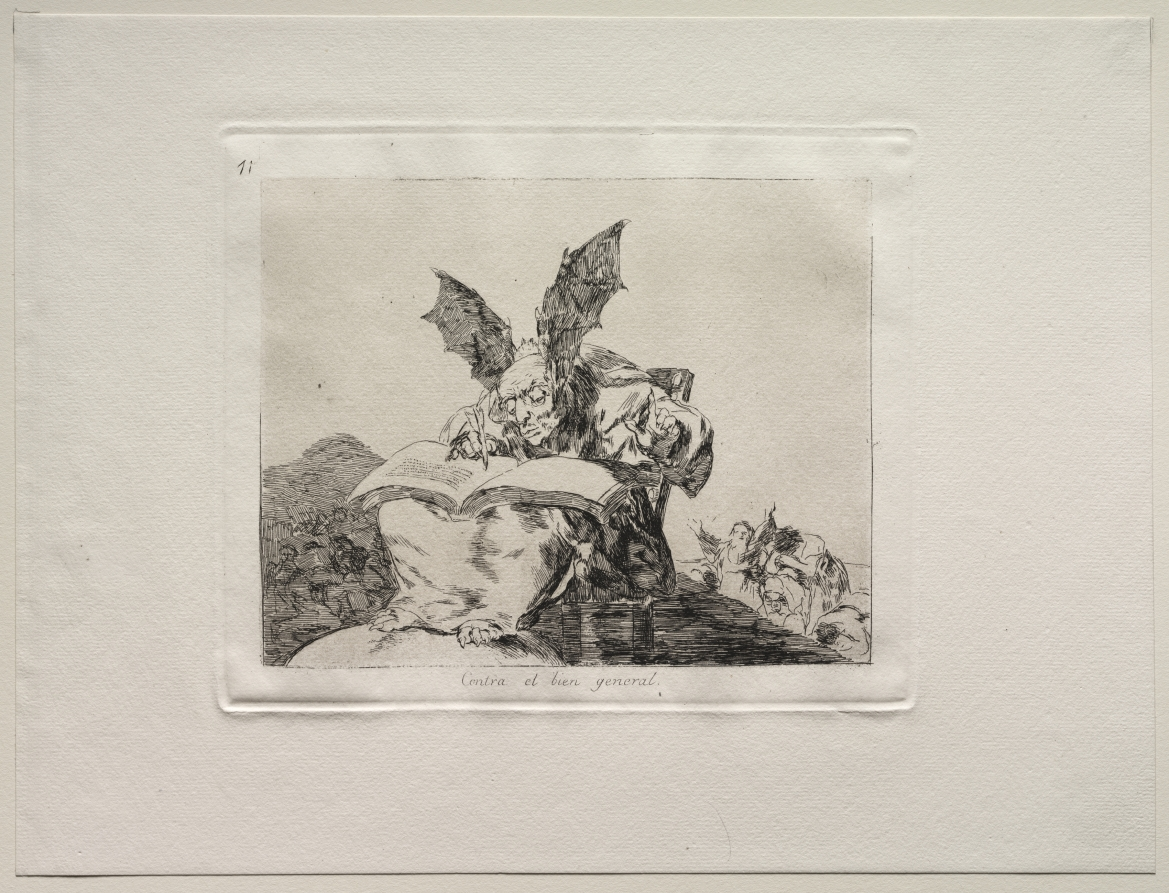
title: The Horrors of War: Against the Common Good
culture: Spain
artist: Francisco de Goya (Spanish, 1746–1828)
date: c. 1810–20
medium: etching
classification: Print